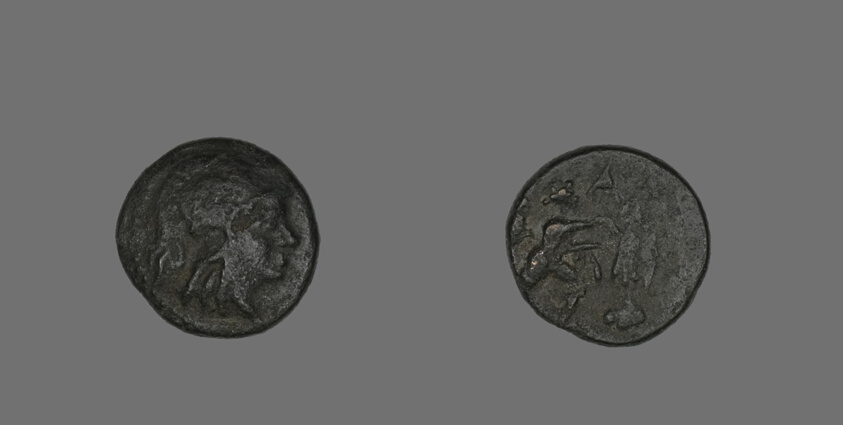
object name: Coin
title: Coin Depicting the Goddess Athena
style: greek, ancient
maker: Greek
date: 277-239 BCE or 229-220 BCE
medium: Bronze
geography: Greece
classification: coin; ancient art; struck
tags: mythological figures, Athena